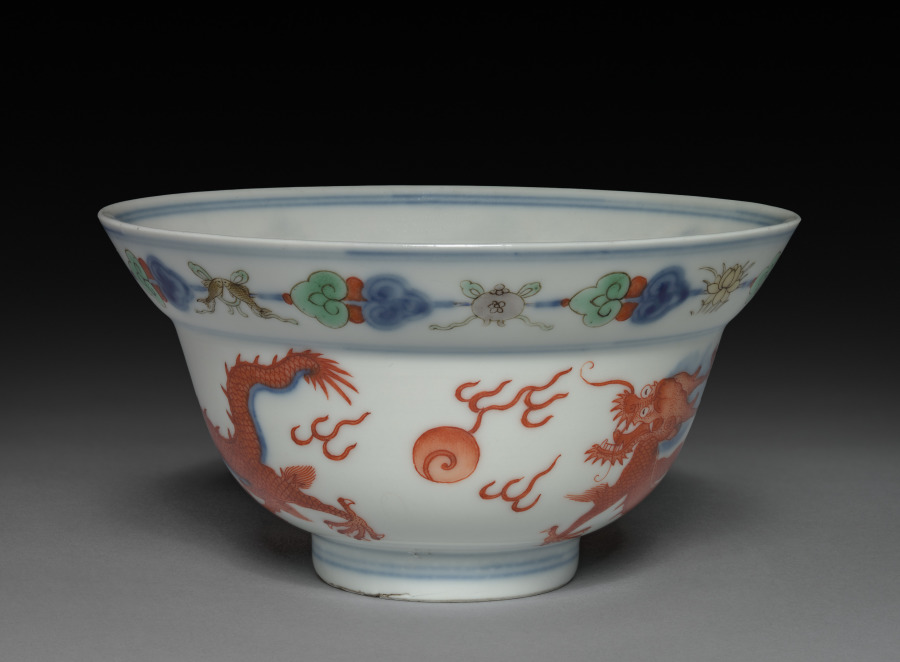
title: Bowl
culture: China, Jiangxi province, Jingdezhen kilns, Qing dynasty (1644-1911), Yongzheng mark and reign (1722-35)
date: 1723–35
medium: porcelain with doucai decoration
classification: Ceramic